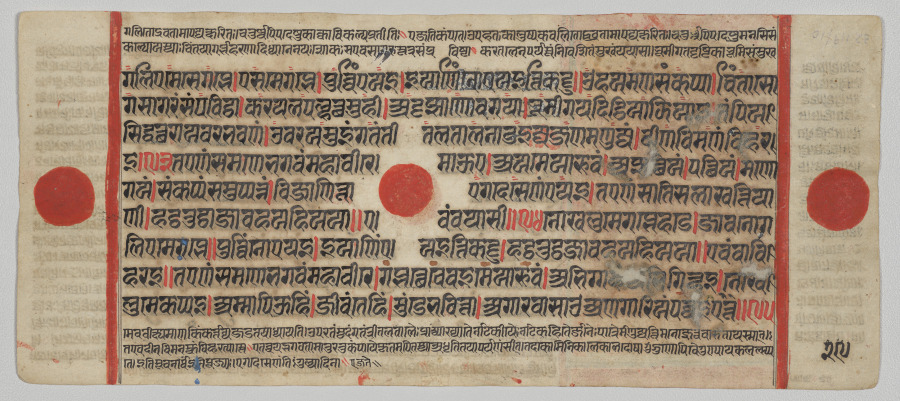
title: Text, Folio 29 (verso), from a Kalpa-sutra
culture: Western India, Gujarat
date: c. 1475–1500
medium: Gum tempera, ink, and gold on paper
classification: Painting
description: This page discusses the pregnancy of Queen Trishala when she was anxious about why she could not feel the baby move. In the painting she addresses her handmaids: “Has the child in my womb been destroyed? Has he been killed? Have I suffered a miscarriage? The child used to move, but now he does not move.” The baby is Mahavira, who will grow to be the historical founder of the Jain religion. According to the text, he remained motionless out of compassion for his mother, not wishing to disturb her. Once he realized how worried she was, he made a little movement, and this filled her with joy.